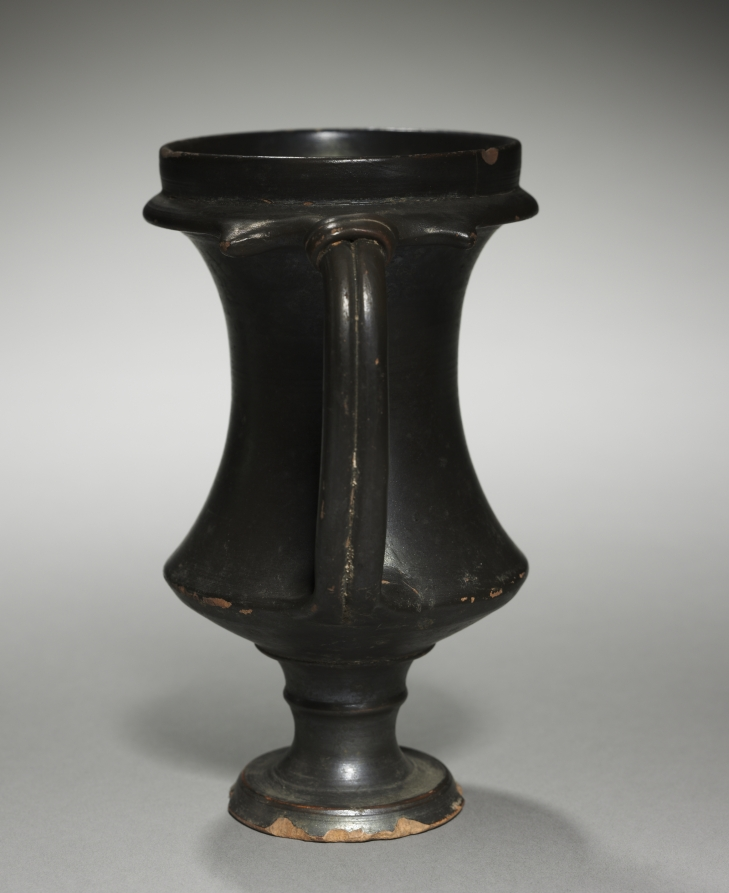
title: Black-Gloss Kantharos or Karchesion (Drinking Cup)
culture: Etruscan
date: 400–200 BCE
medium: ceramic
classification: Ceramic